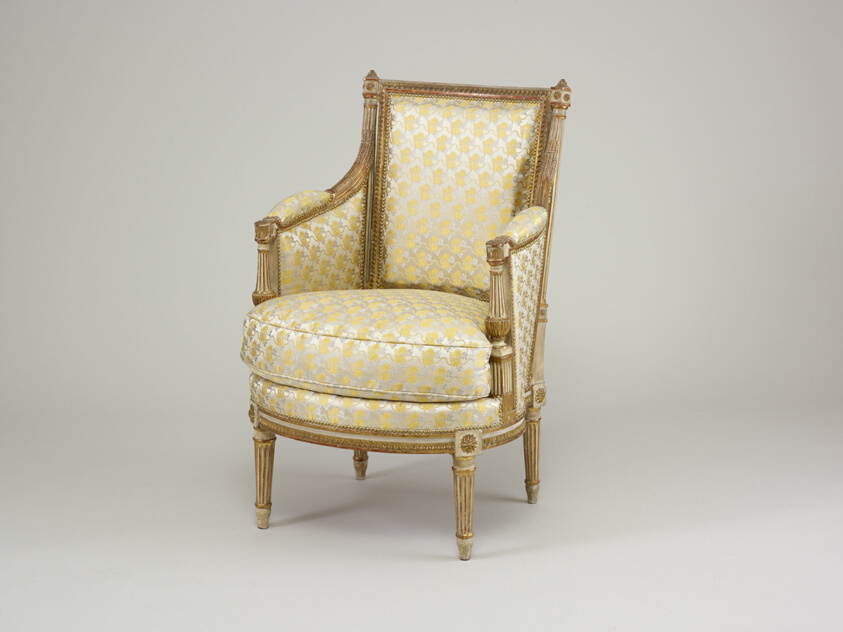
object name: Furniture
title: Armchair (one of a pair)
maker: Designed by Jean Avisse; French, 1723-1796; Paris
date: 1780/85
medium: Beechwood, painted and gilded, modern reproduction upholstery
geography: Paris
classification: wood; furniture